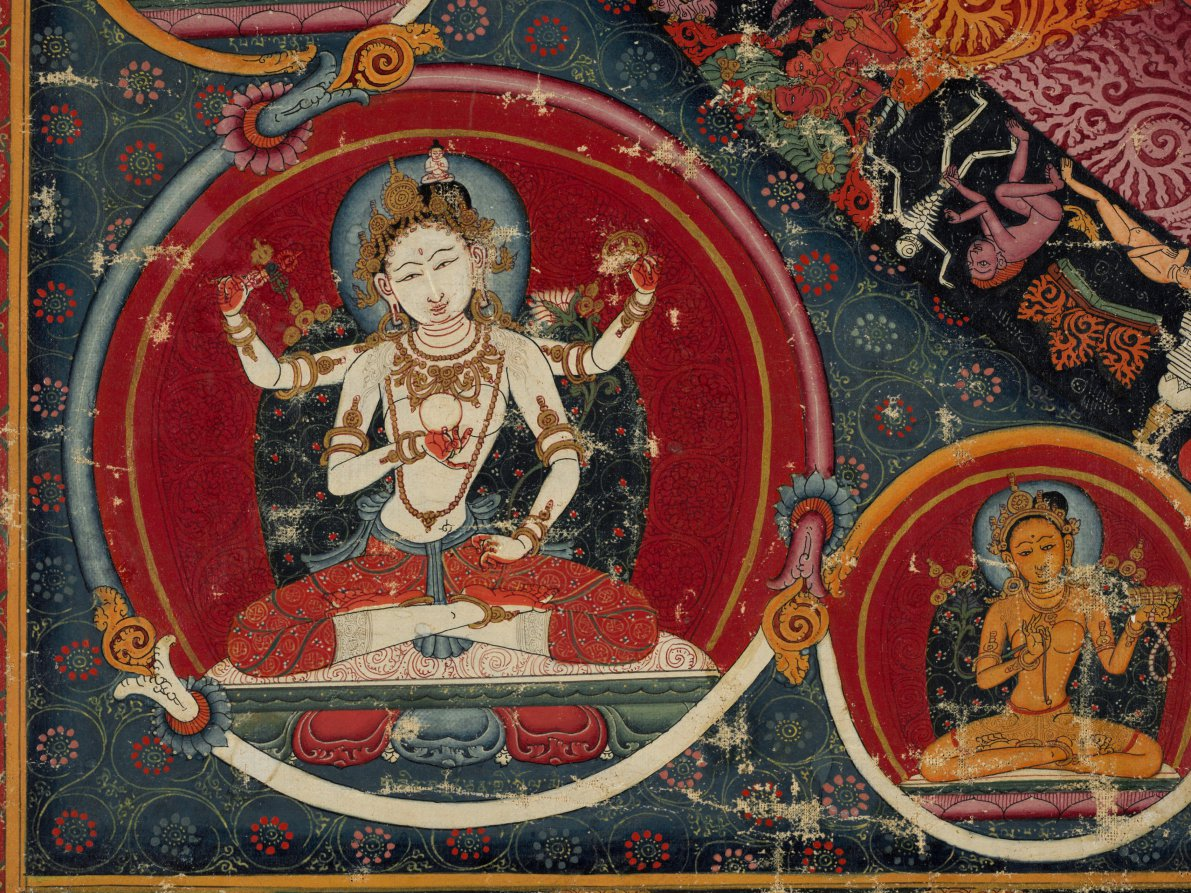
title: Twenty-three Deity Nairatma Mandala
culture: Central Tibet, Sakya-affiliated monastery, 14th century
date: c. 1375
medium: Gum tempera, ink, and gold on cloth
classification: Painting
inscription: The inscription along the bottom says: Twenty-three deity Nairatma Mandala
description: One of the main types of imagery in tantric Buddhist art is the mandala, a two-dimensional diagram of the realm of an enlightened being. This mandala depicts the palace of Nairatma, who dances in the center surrounded by her entourage. Using the painting as a guide, the tantric practitioner in meditation mentally projects the two-dimensional plan into three-dimensional space and enters into it. The outermost ring contains depictions of the cremation grounds, where corpses are being burned and consumed, as well as tantric yogis and masters who work there in order to understand the impermanence of the body, defeat their fear of death, and overcome irrational aversions to impure aspects of life. Virupa is depicted twice, always pointing to arrest the sun with his raised left hand. He sits among the row of lineage masters along the top edge, and is also depicted in the topmost segment of the ring of cremation grounds, being served a cup of liquor. Along with lineage masters at the top of this impressive painting, bodhisattvas and important masters are depicted in the spandrels, each identified by an inscription.